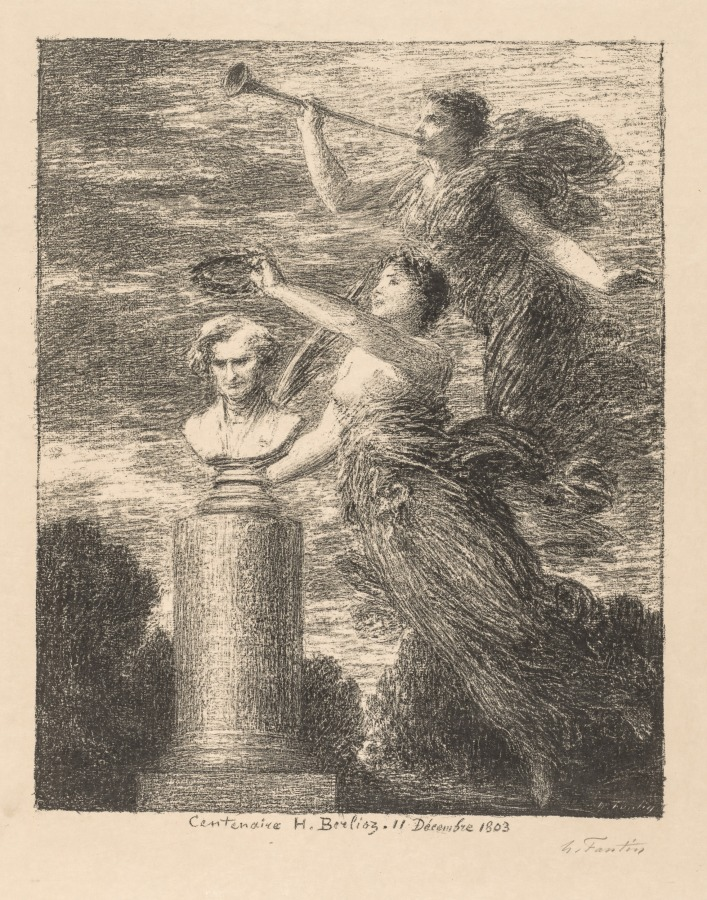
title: Centenary of Hector Berlioz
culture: France, early 20th Century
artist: Henri Fantin-Latour (French, 1836–1904)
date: 1903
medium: lithograph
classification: Print